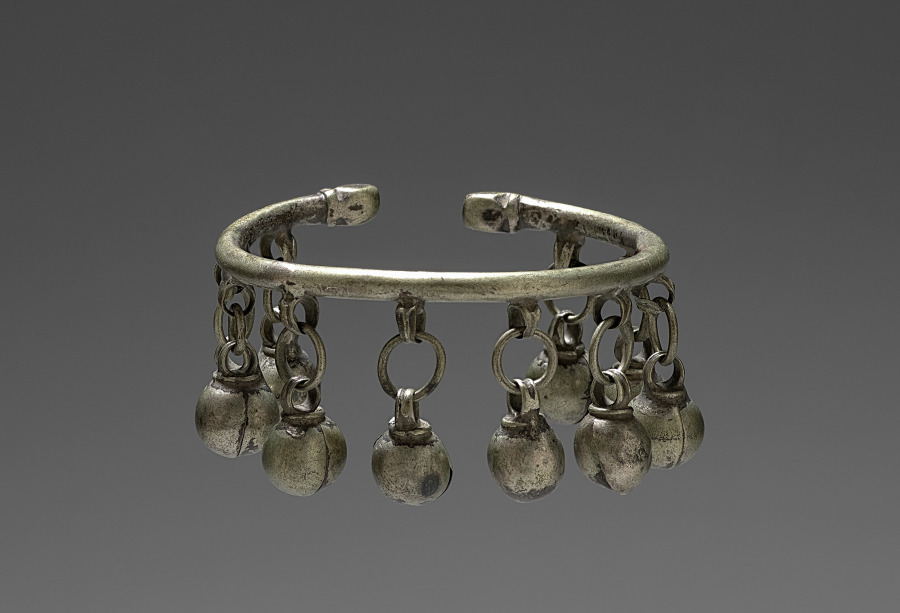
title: Wristlet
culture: India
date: 1800s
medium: silver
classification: Jewelry